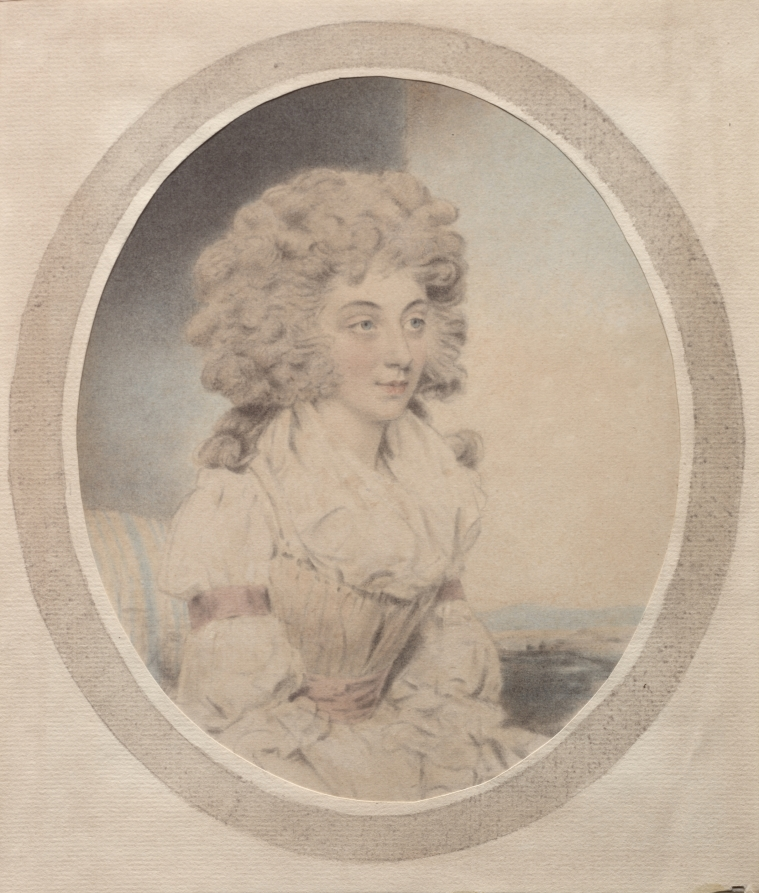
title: Seated Young Lady Facing Right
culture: England, 18th century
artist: John Downman (British, 1750–1824)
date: c. 1770–1824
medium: brush and black chalk wash and watercolor with traces of black crayon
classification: Drawing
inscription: VERSO OF STRETCHER, upper center, in graphite: [? 156?, partially masked] ; upper right, in graphite: C.E.F.